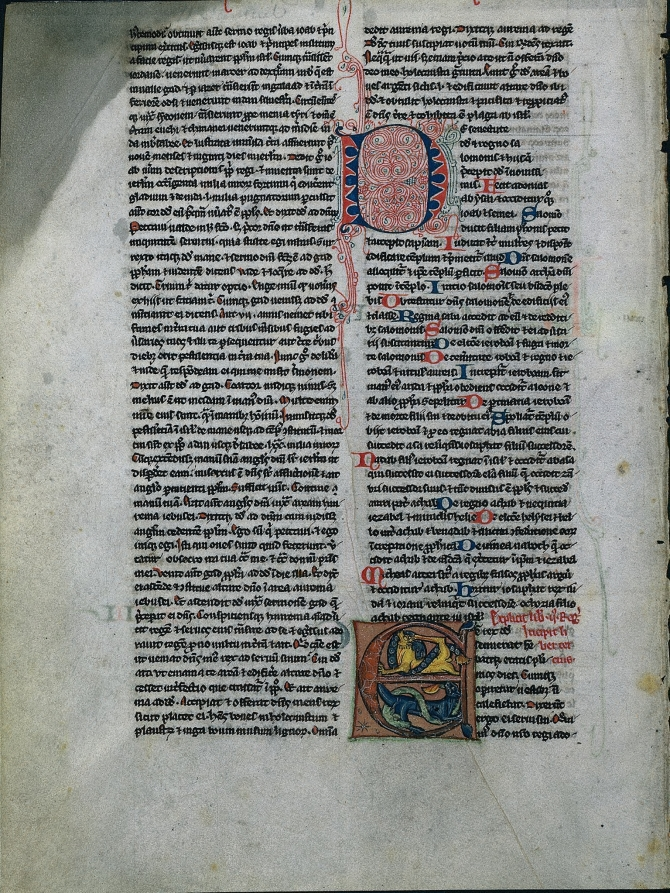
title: Leaf from a Bible: Initial E: Entwined Lions and Serpents (1 of 2 Excised Leaves)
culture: England, Glastonbury(?), 13th century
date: c. 1225–50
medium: tempera and ink on vellum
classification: Manuscript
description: This pair of leaves from the same one-volume Bible have been traditionally associated with the Benedictine Abbey of Glastonbury in southwest England. It is known that the Bible once belonged to the English antiquary and collector, Roger Gale (1672–1744), whose library of 450 manuscripts once included two of the surviving 35 books from Glastonbury Abbey. Until its dissolution in 1539, Glastonbury was one of the greatest and wealthiest abbeys in Europe. Given its vast wealth and the recorded library lists, the abbey must have been a substantial patron of the arts. However, only a few illuminated manuscripts can now be positively identified as Glastonbury work.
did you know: The museum owns another leaf from this same bible, 2011.52.